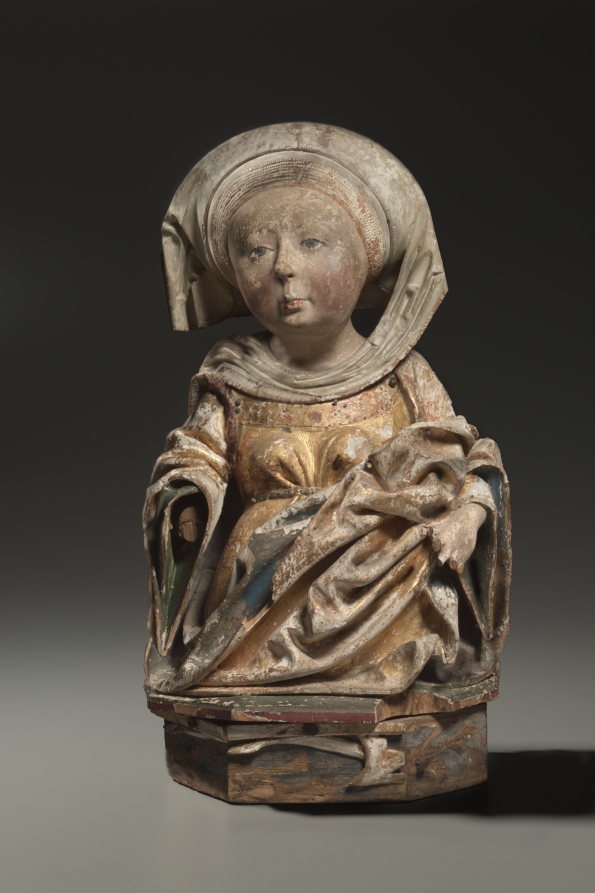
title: Female Bust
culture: Austria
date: c. 1470–1500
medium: Painted and gilded lindenwood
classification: Sculpture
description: This female bust is part of a series of three in the museum's collection. The identity of the figures has been speculated by scholars but without resolution. Because this and the other female busts in the series do not retain their attributes, it is difficult to know their original purpose. It is possible that they may have once formed a group of female saints from the predella of a large altarpiece. Since the sculpture is not carved in the round, this hypothesis has merit. Another recent proposal is that this and the other sculptures may be from a series of female busts representing the wise and foolish virgins referenced in Matthew 25:1-13, a parable by Jesus admonishing listeners to be spiritually prepared.